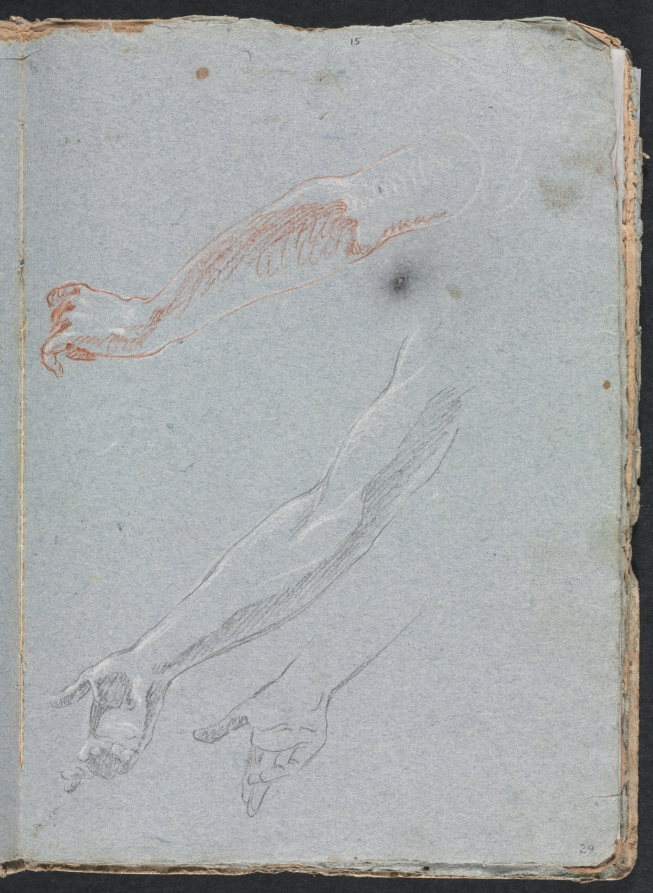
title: Verona Sketchbook: Study of hands and arms (page 29)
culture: Italy, 18th century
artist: Francesco Lorenzi (Italian, 1723–1787)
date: 1760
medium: black and red chalk with white heightening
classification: Bound Volume